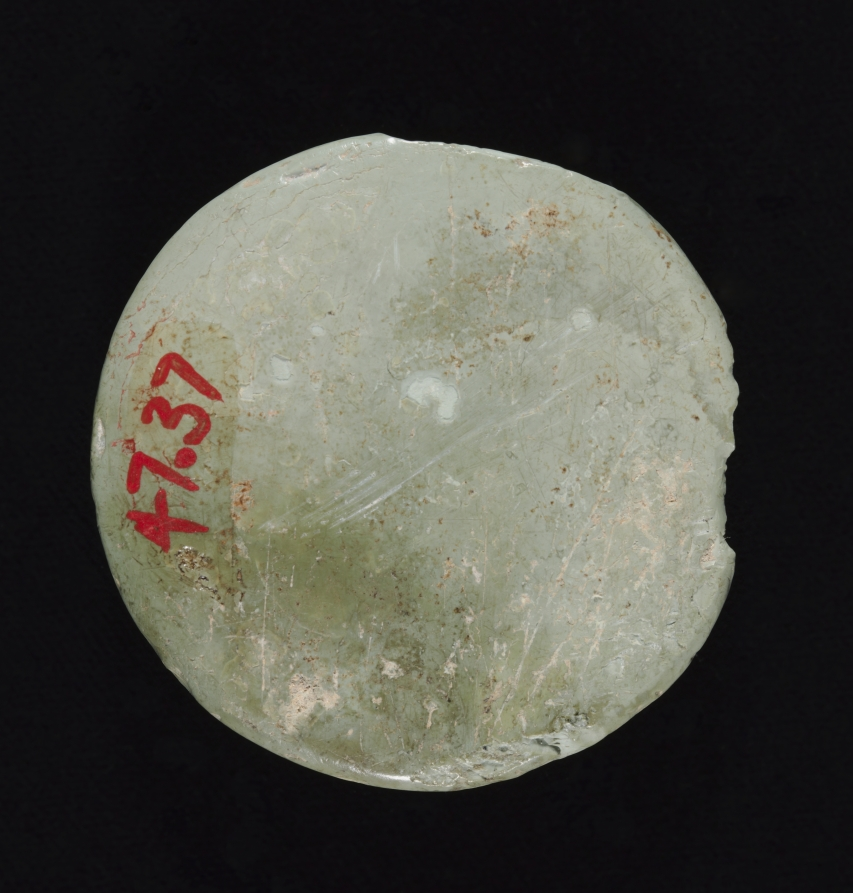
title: Medallion with Christ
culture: Byzantium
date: c. 1200–1400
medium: steatite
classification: Glyptic